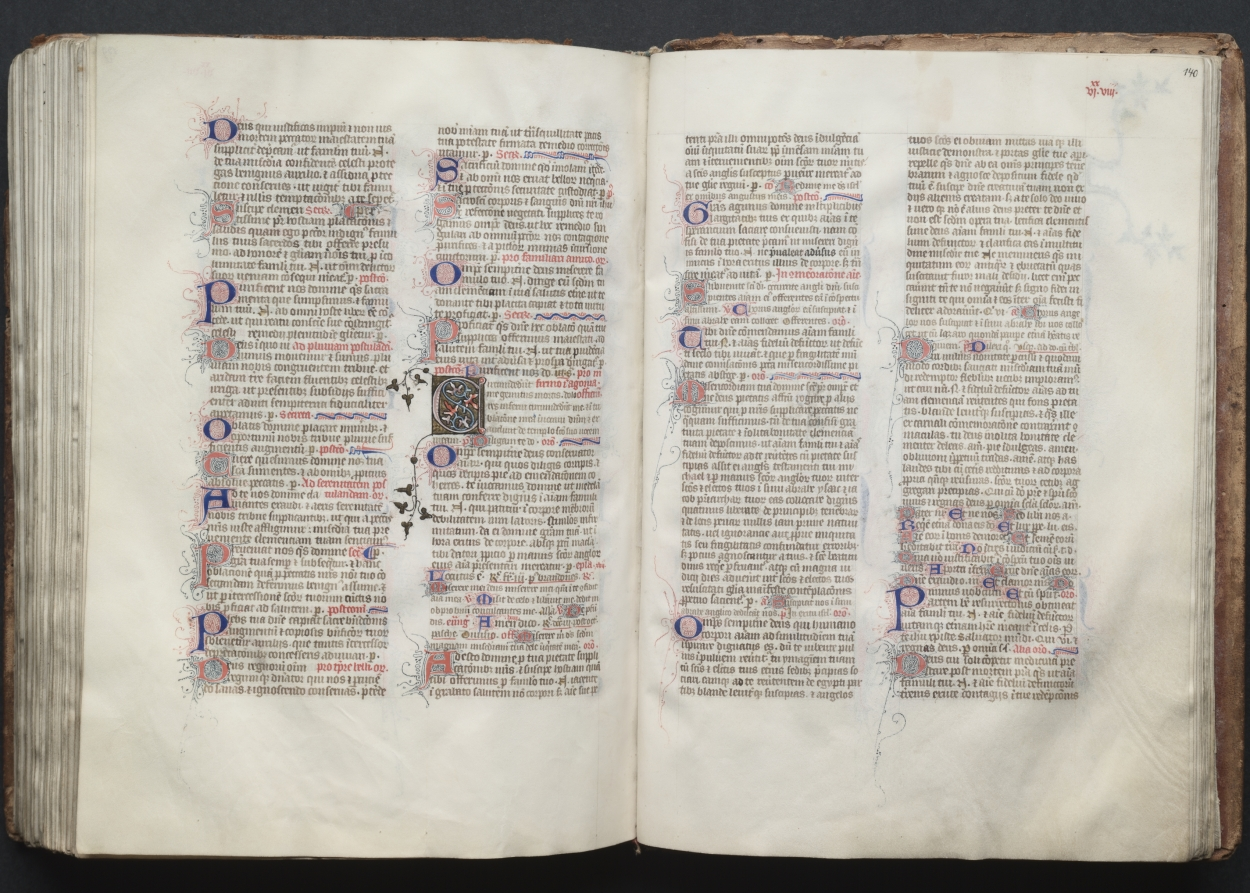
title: The Gotha Missal: Fol. 139v, Text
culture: France, Paris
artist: Master of the Boqueteaux (French)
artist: and Workshop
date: c. 1375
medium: ink, tempera, and gold on vellum; blind-tooled leather binding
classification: Bound Volume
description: The style and quality of this manuscript's decoration is typical of deluxe Parisian books made for aristocratic or royal patrons. Most of the book's decoration appears to be the work of the Master of the Boqueteaux, an artist active at the court of King Charles V (died 1380). His style was apparently shared by a number of book illuminators working in and around Paris. It is very possible that the Gotha Missal belonged to Charles V, but is not provable because the manuscript has no royal portraits and lacks a colophon. Given the book's magnificent decoration, however, it would seem that it was produced for a Valois prince, if not for the king himself. The manuscript receives its name from the German dukes of Gotha, its later owners.